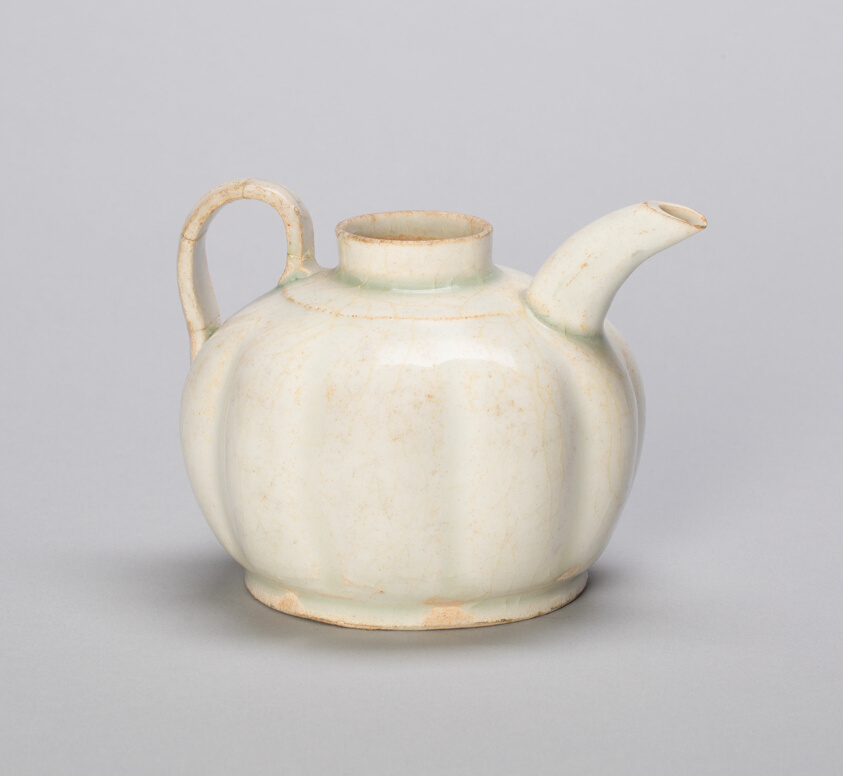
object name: Vessel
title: Lobed Melon-Shaped Ewer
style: Chinese (culture or style)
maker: China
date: Song dynasty (960–1279)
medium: Qingbai ware; porcelain with underglaze molded decoration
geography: China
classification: ewer (vessel); vessel; ceramics